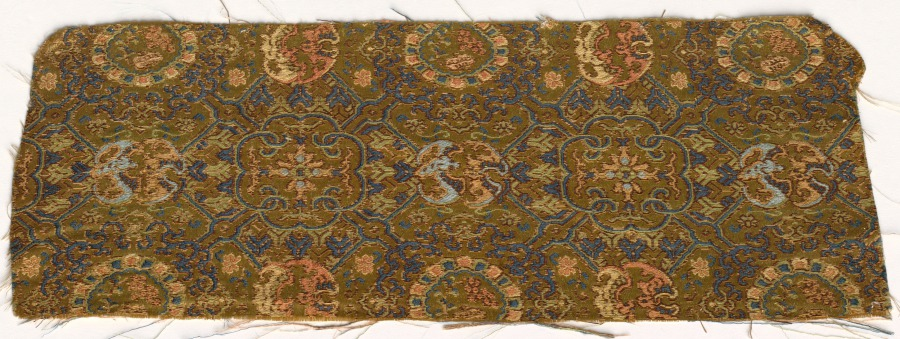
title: Fragment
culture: China, 19th century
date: 1800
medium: silk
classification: Textile